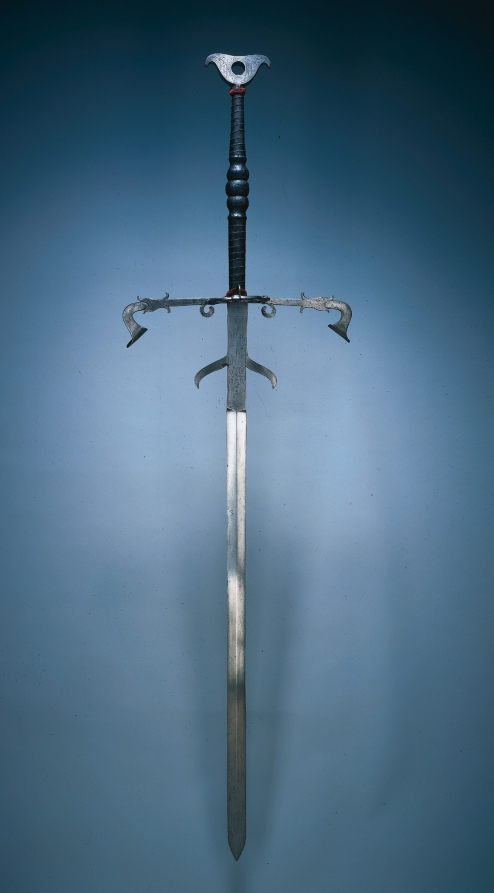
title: Two-Handed Sword of the State Guard of Julius of Brunswick-Lunüneburg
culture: Germany, Brunswick, 16th century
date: 1574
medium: steel, leather and wire bound grip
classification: Arms and Armor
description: This is one of a large series of swords distinguished by the fish-shaped crossbar on the hilt (quillon) and pierced, crutch-shaped pommels. Each sword in this series is also dated and numbered. The crowned monogram of Duke Julius, the year 1574, and the number of this particular sword (N 59) are etched on the portion of the blade between the hilt and the beginning of the sword’s edge (or ricasso).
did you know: The sheer size of this sword is both awe-inspiring and intimidating, but the highly ornate engraved details indicate that it wasn't used in battle. Imagine your security system being a guard wielding a blade similar to this one.